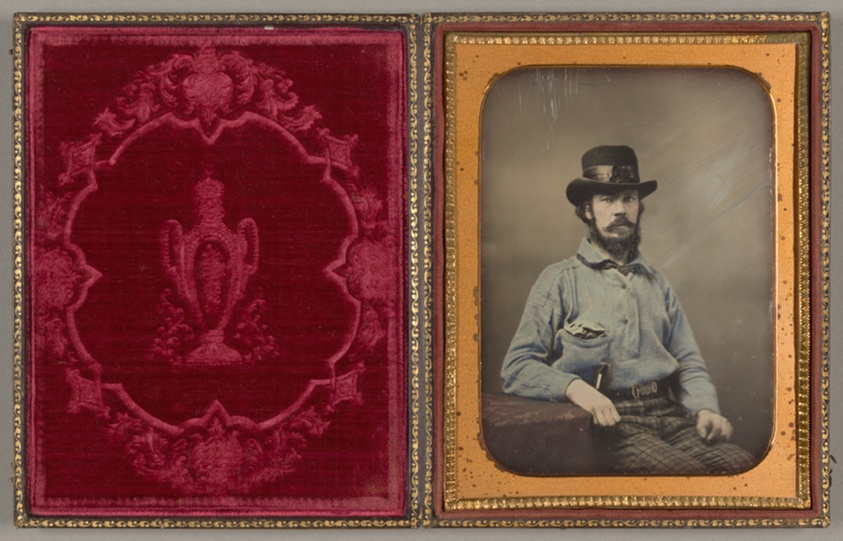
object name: Photograph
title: Untitled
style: 19th century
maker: Artist unknown; American, 19th century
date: c. 1850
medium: Daguerreotype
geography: United States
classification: daguerreotype; photographic process; photography; photograph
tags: Collected by Hugh Edwards